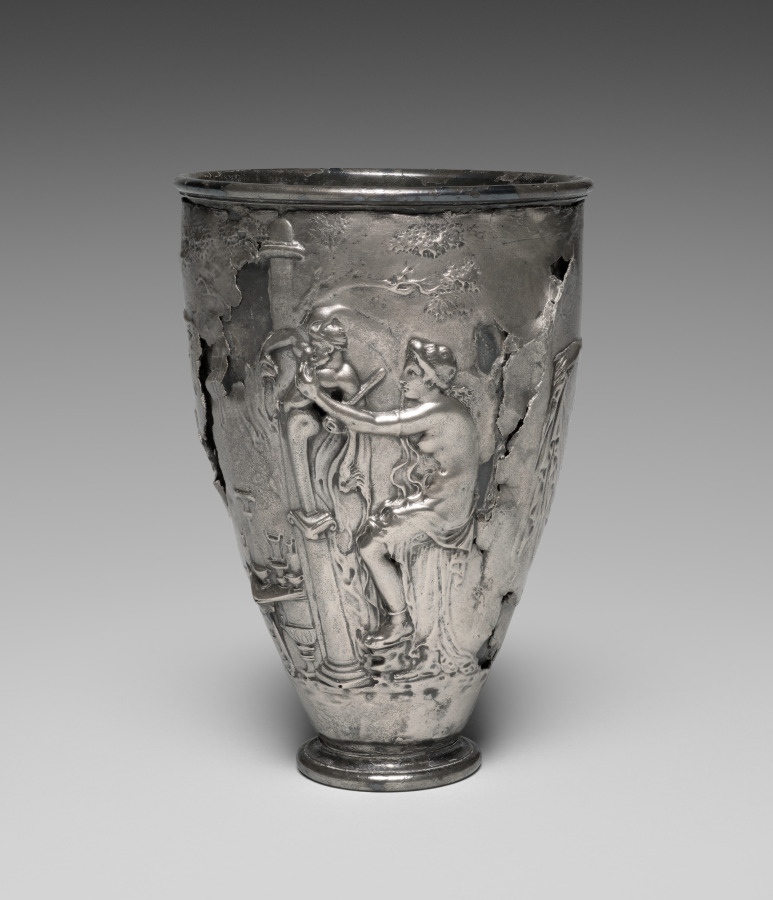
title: The Vicarello Goblet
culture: Italy, Vicarello (ancient Aquae Apollinares), Roman, Augustan period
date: 25 BCE–25 CE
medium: silver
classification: Metalwork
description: This masterpiece of the Roman silversmith’s art is exquisitely worked in relief. The multifigure scene centers on a rustic shrine of the ithyphallic fertility god Priapus, son of Dionysos. He takes the form of a stylized boundary marker atop a column, where a woman seems to have brought him to life by touching him. To the left sits a table with votive offerings to the god. Flanking the shrine are a satyr and maenad, dancing ecstatically.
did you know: This silver cup was found north of Rome at Vicarello (ancient Aquae Apollinares), probably in 1862.